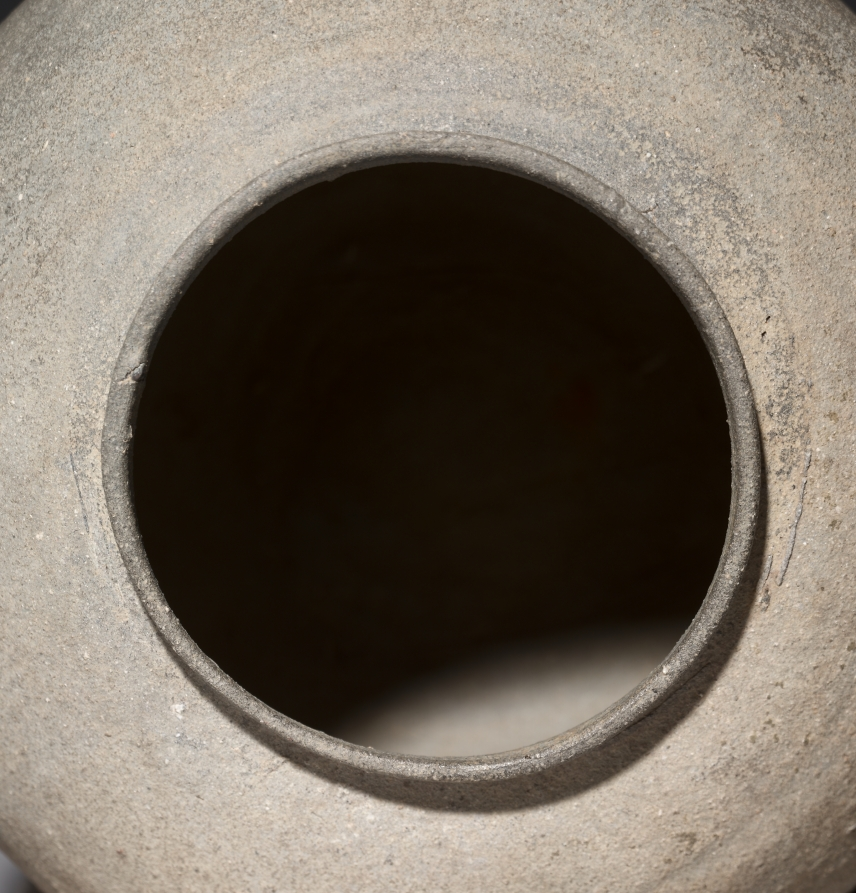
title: Cinerary Urn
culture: Japan, Heian period (794–1185)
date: c. 800–850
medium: stoneware with slight natural ash glaze (Sue ware)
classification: Ceramic